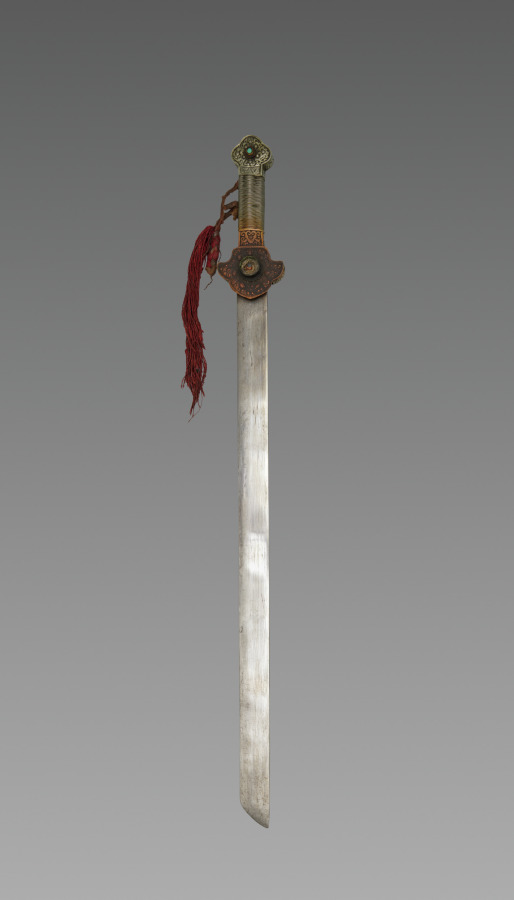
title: Sword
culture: Tibet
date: 1800s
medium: iron and silver with bone, turquoise, leather and brass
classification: Arms and Armor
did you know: There is a cutting edge only on one side.